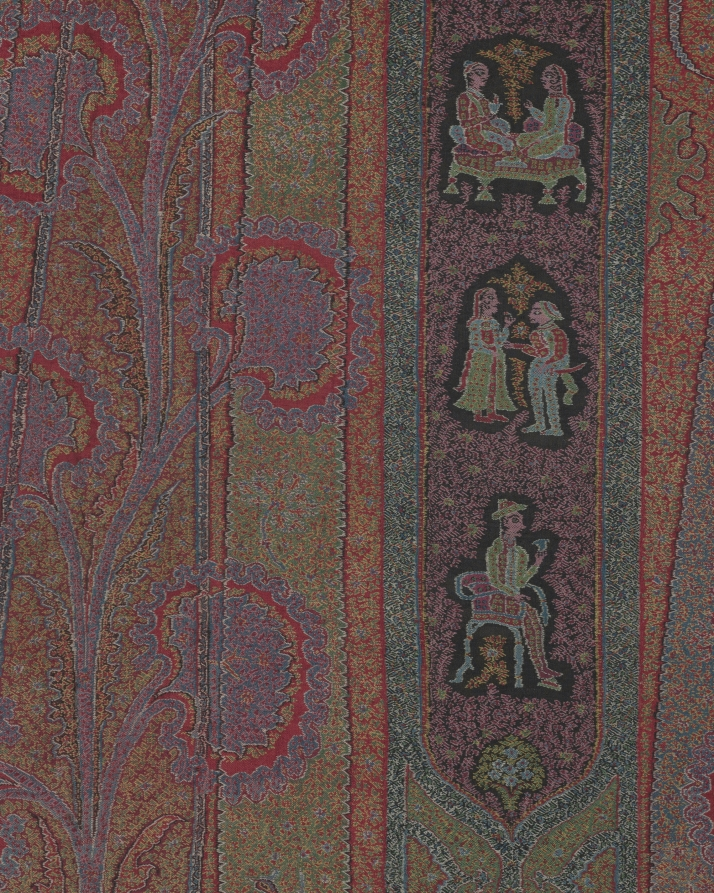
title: Long shawl with woven figures and animals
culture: India, Kashmir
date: c. 1885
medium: 2/2 twill tapestry weave, double interlocked and pieced: wool (possibly pashmina)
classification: Textile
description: Kashmir shawls from India were status symbols in Europe during the 1800s, and few are as rare as this woven example. Over 200 human figures take part in drinking, smoking, dancing, and falconry in the Indian princely scenes that enliven the shawl’s borders and four dark stripes. The stripes alternate with large elongated boteh, or paisley, motifs that intertwine with blossoming stems in a European style adapted by Kashmiri textile artists. This extraordinary woven shawl was probably made to dazzle the jury at one of the European expositions of industrial products, as almost all other figural shawls were embroidered. It was woven in many pieces and then skillfully joined with colorful harlequin end borders.